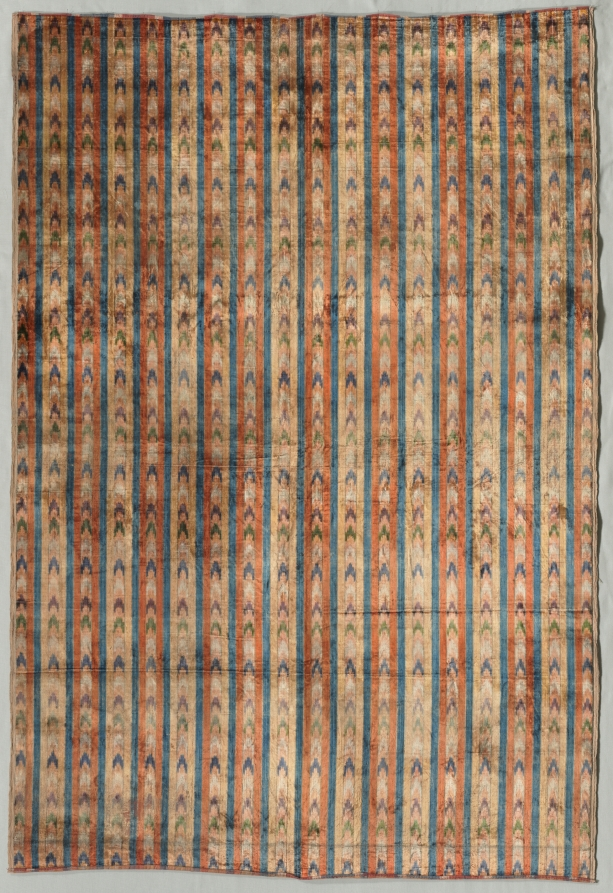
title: Velvet Panel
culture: Iran, 19th century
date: 1800s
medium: velvet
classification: Velvet